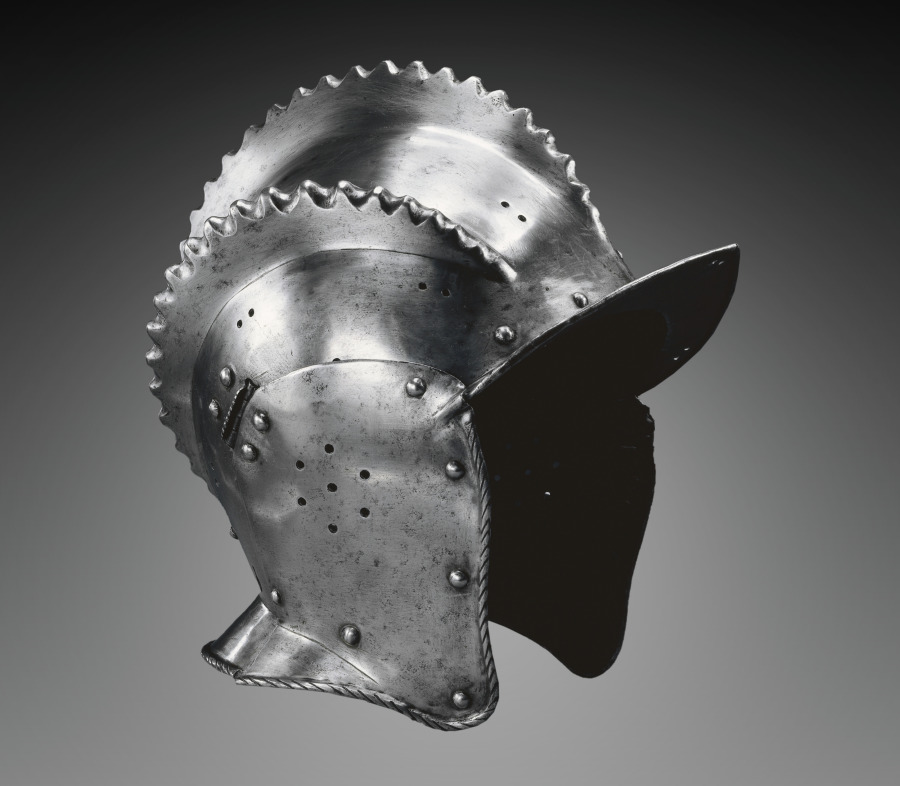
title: Triple-Crested Burgonet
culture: Germany, Augsburg (?), 16th century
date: c. 1560–70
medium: steel, leather bands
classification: Arms and Armor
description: Popular throughout the 1500s and 1600s, the burgonet was a light, open headpiece favored by cavalry and infantry alike. Its main features are a peak over the eyes and hinged cheekpieces that fasten with a strap or lace under the chin. The basic helmet lent itself to variations of design or ornamentation. This version, with its triple crests, is known to have been produced in Augsburg. The style was worn by the bodyguard of Emperor Charles V (ruled 1519-56).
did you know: The open face of the burgonet meant it was a lighter and cheaper to manufacture than closed face helmets, it also allowed the wearer to see more freely, the trade off was less protection for the face.